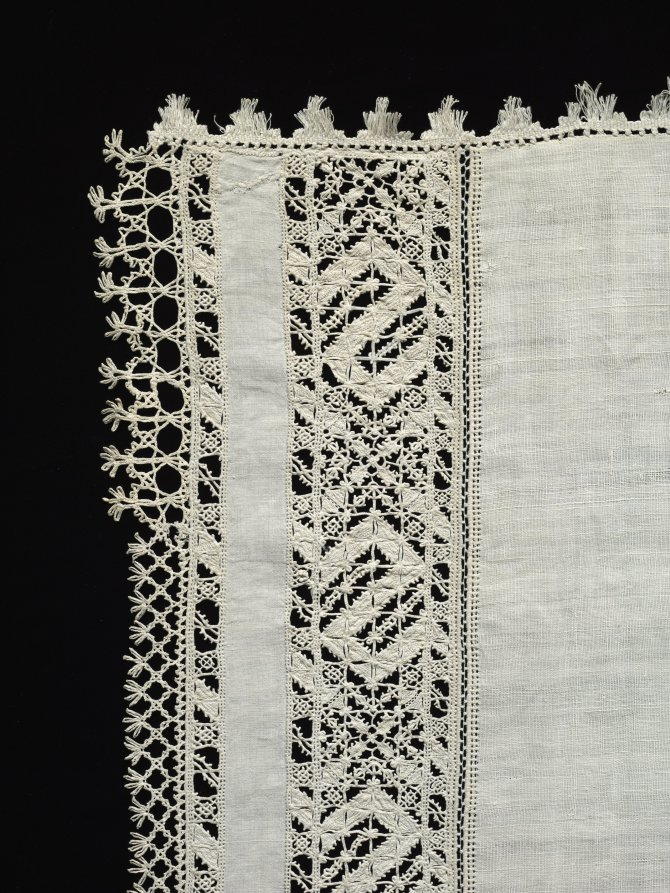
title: Lace Cloth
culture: Italy, Venice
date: 1500s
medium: Linen: needle lace, reticella and bobbin lace border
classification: Lace